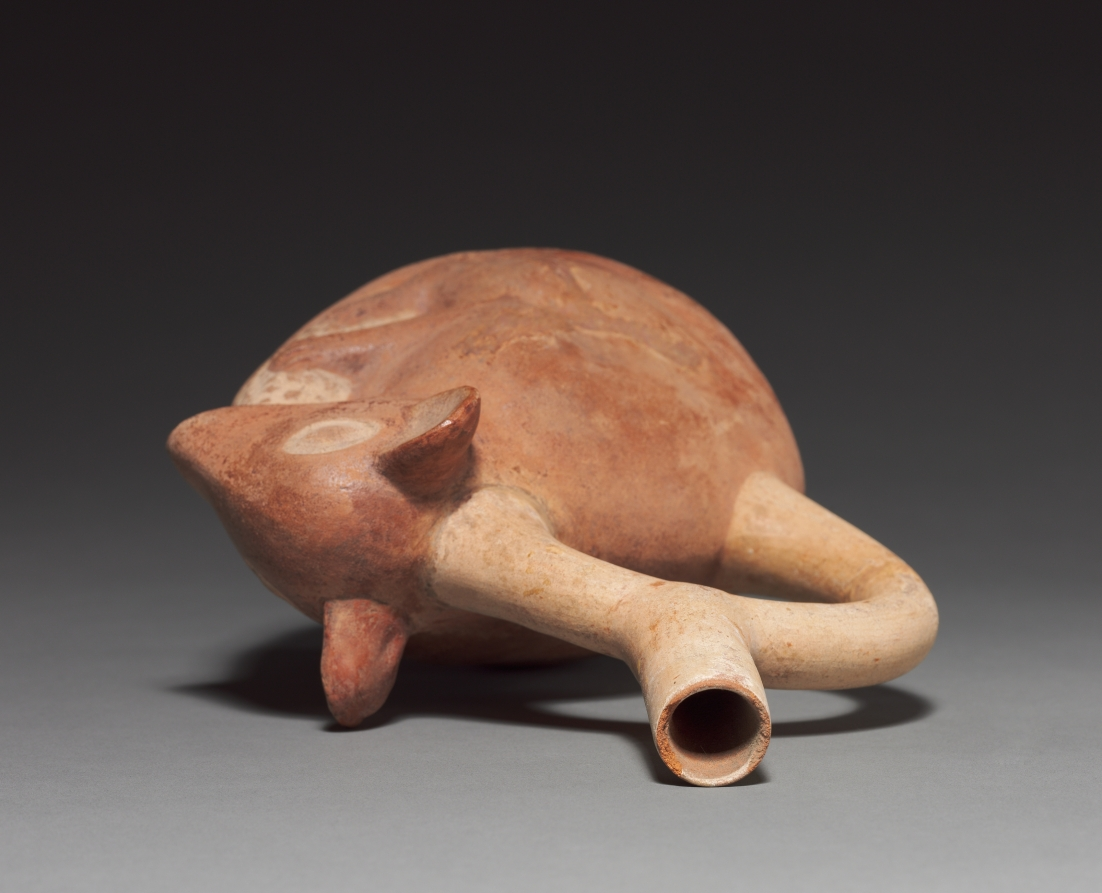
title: Rodent with Corn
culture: Peru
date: 50–800 CE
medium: pottery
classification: Ceramic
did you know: From the Moche, renowned for animal portraits, comes this rodent gnawing maize (corn).